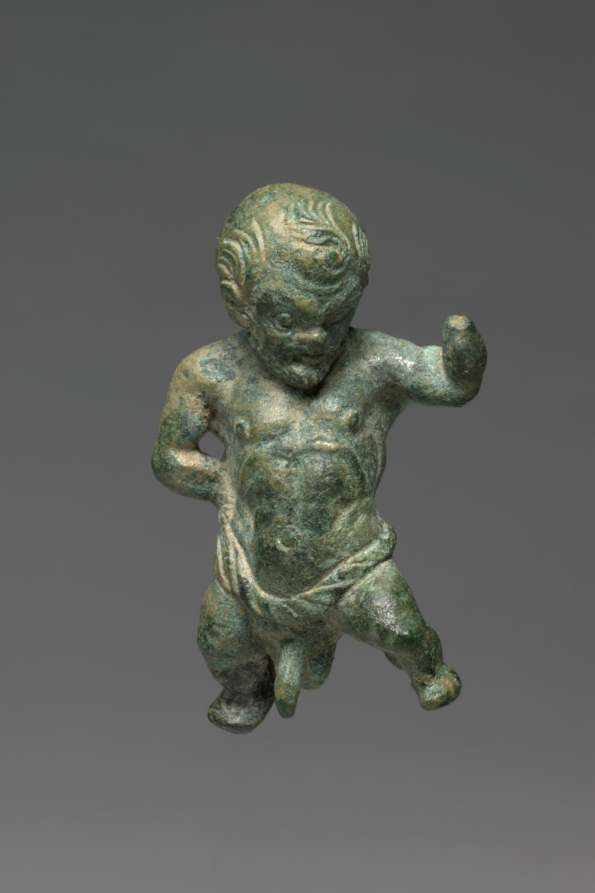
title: Dancing Dwarf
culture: Italy(?), Roman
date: 100 BCE–100 CE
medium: bronze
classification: Sculpture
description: This small, bearded figure wears a twisted sash around his hips and has an exaggerated phallus. He stands with his left arm raised and his right arm on his waist. His left hand is missing but could have once held krotala (ancient clapper-like instruments), as other examples of dancing dwarves hold. People with dwarfism in art are typically rendered with a large head, widely spaced eyes, sharply raised eyebrows, and a depressed nasal bridge, all seen on this figure. This object may have been used as an apotropaic, or protective, amulet to ward off evil.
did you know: People with dwarfism were favorite subjects in Hellenistic art, and then became popular in the Roman Empire.